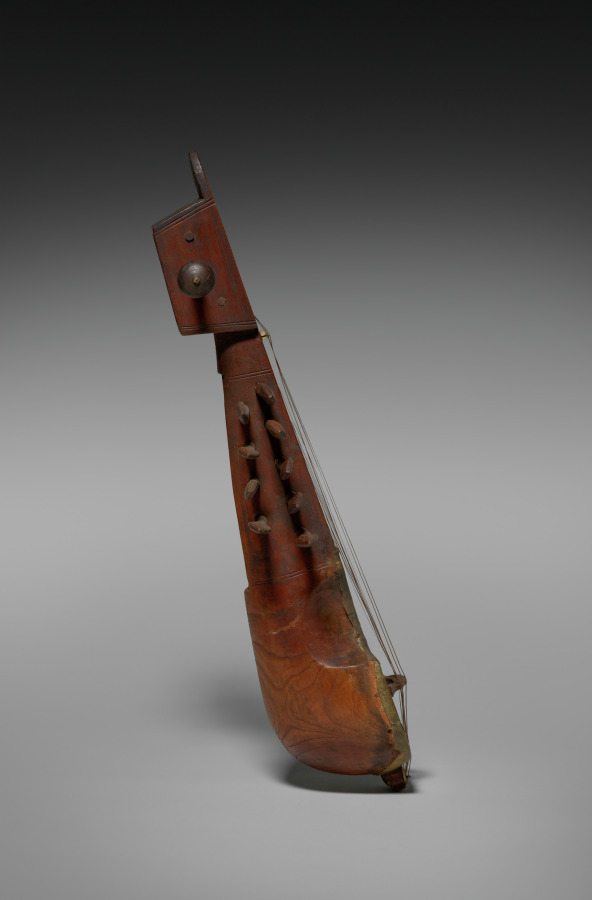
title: Sarangi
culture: India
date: 1800s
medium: Wood with traces of pigment, parchment, bone or ivory, mirrored glass, and copper strings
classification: Musical Instrument